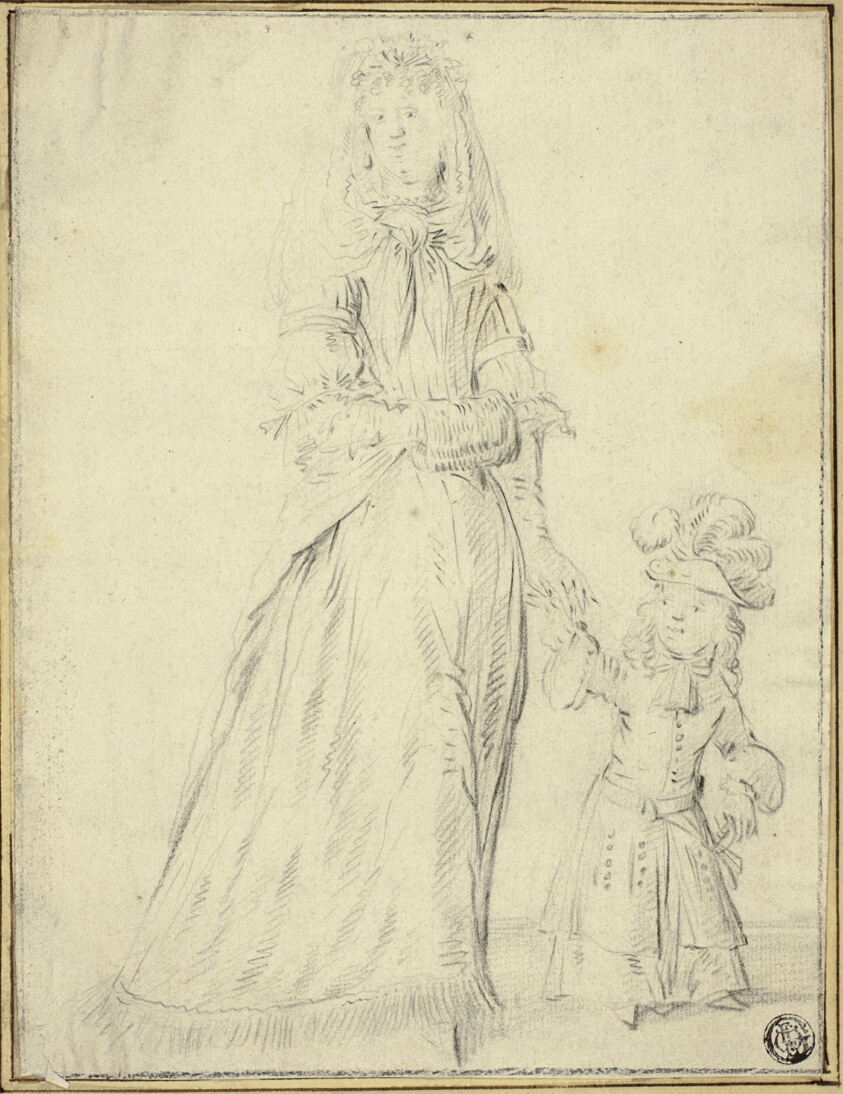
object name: Drawing and Watercolor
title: Lady and Child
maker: Romeyn de Hooghe (Dutch, 1645-1708)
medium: Black chalk, on ivory laid paper, tipped onto cream laid paper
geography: Holland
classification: graphite; drawings (visual works); prints and drawing